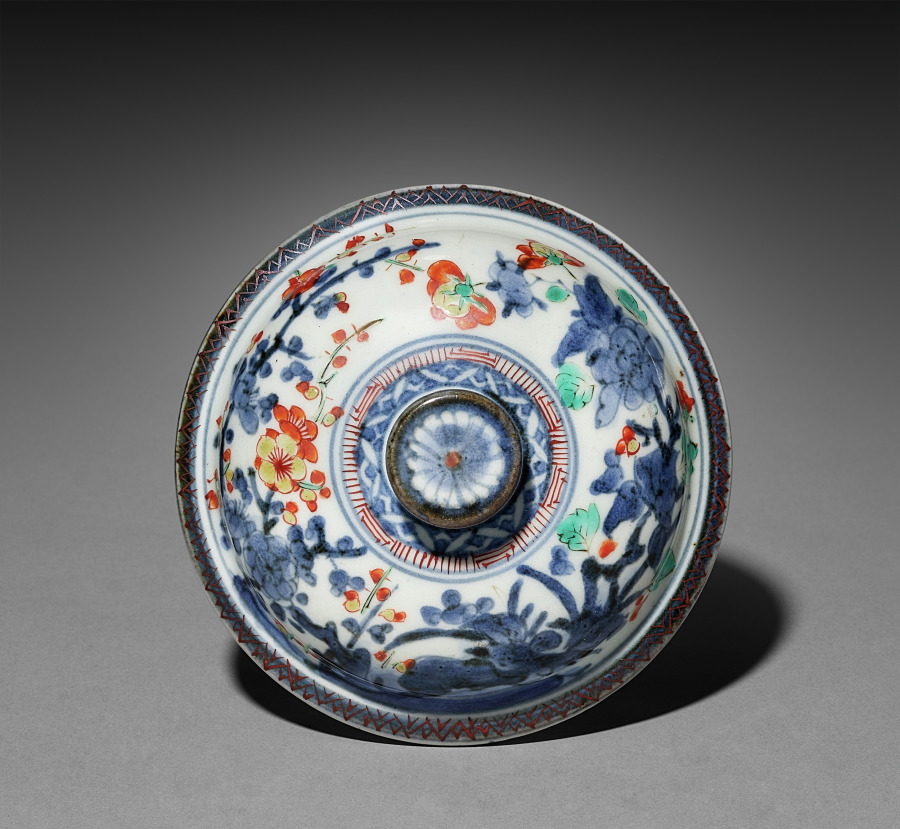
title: Covered Jar with Chrysanthemums, Peonies, and Plum (lid)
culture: Japan, Edo period (1615–1868)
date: late 1600s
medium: porcelain with underglaze blue and overglaze color enamel (Hizen ware, Kakiemon type)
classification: Ceramic